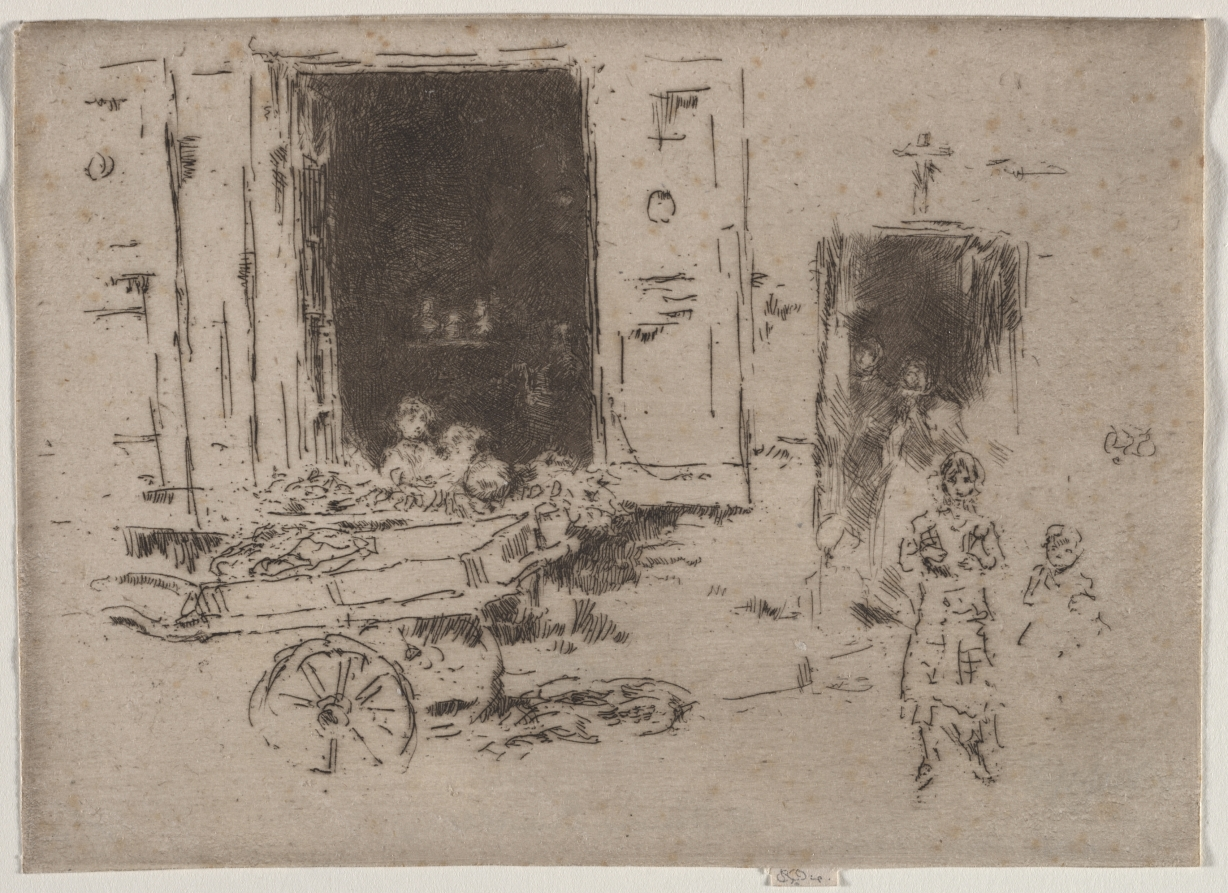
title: The Barrow - Quartier des Marolles, Brussels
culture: America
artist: James McNeill Whistler (American, 1834–1903)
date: 1887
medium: etching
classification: Print